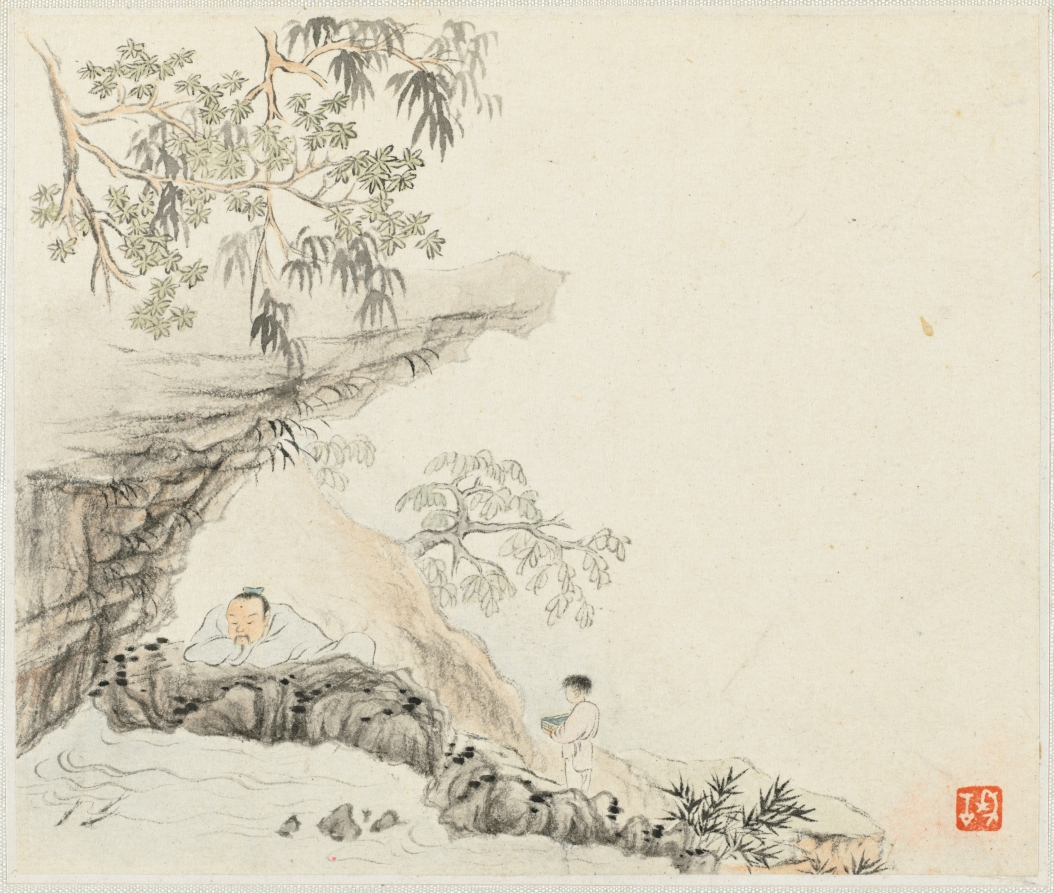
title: Album of Landscape Paintings Illustrating Old Poems: Scholar watching Fish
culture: China, Qing dynasty (1644-1911)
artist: Hua Yan (Chinese, 1682–c. 1765)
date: 1745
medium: album leaf, ink and light color on paper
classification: Painting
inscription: Seal lower right corner